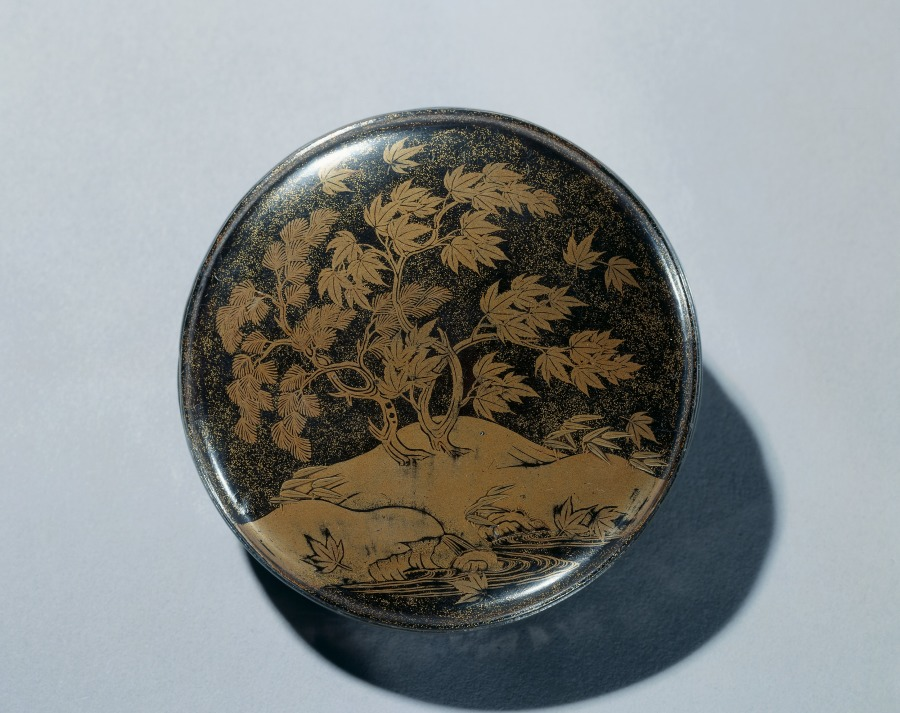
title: Mirror Container with Design of Maple Tree and Autumn Shower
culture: Japan, Muromachi period (1392–1573)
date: 1400s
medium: lacquer on wood with decoration in maki-e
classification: Lacquer